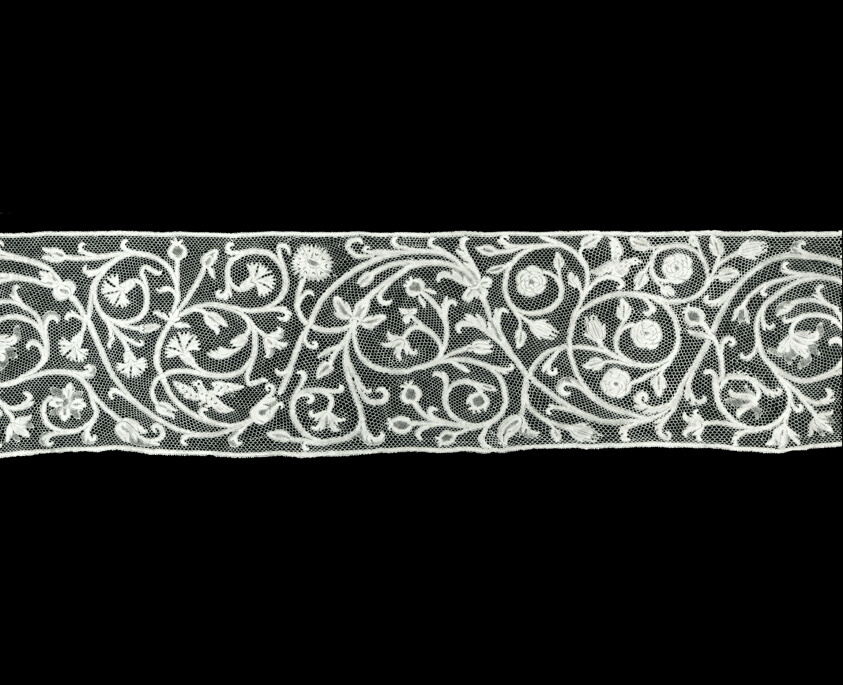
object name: Textile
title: Border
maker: Italy, Milan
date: 1701/50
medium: Linen, bobbin part lace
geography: Milan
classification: textile; lace - bobbin